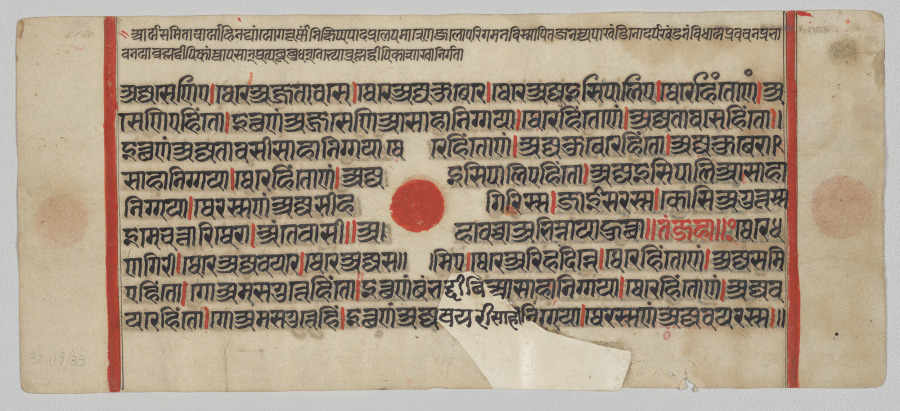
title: Text, Folio 64 (recto), from a Kalpa-sutra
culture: Western India, Gujarat, last quarter of the 15th century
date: c. 1475–1500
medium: Gum tempera, ink, and gold on paper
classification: Painting